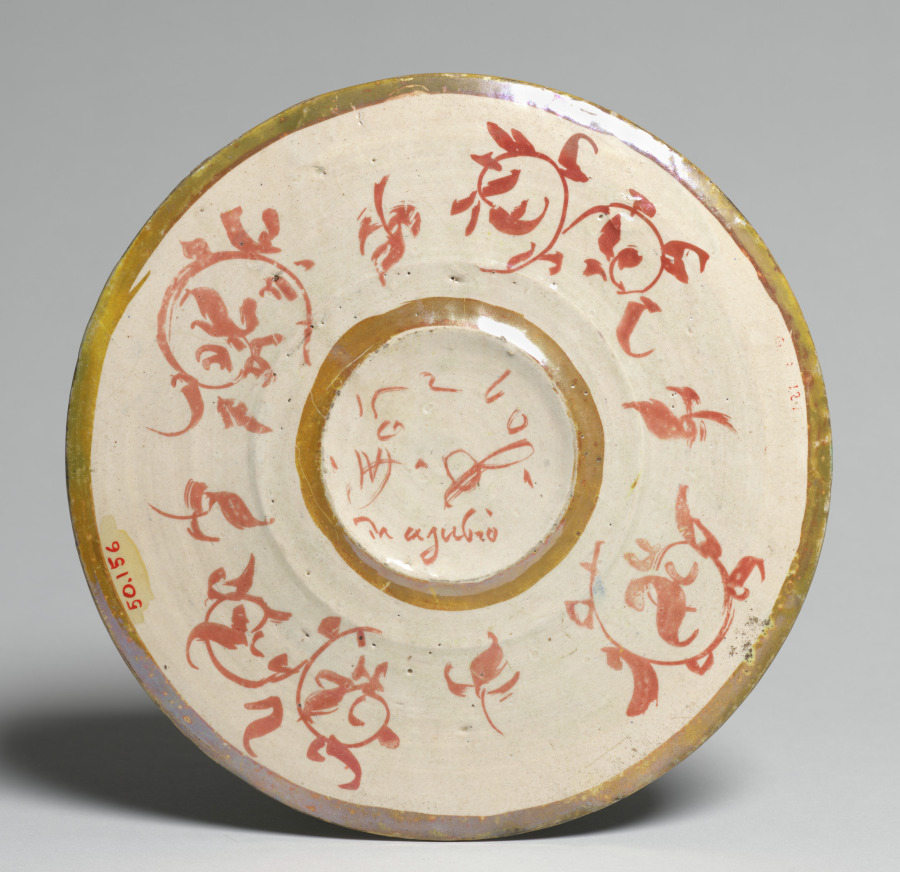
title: Plate Depicting the Myth of Cadmus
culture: Italy, Urbino region, Gubbio, 16th century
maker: circle of Maestro Giorgio Andreoli (Italian, 1465?–1553)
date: 1526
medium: tin-glazed earthenware with gold lustre (maiolica)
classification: Ceramic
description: Obeying the command of an oracle, Cadmus followed a cow to Boeotia, or “oxen-land.” There he slayed a dragon and buried its teeth in the ground. From the teeth grew a crop of warriors who fought each other until only the strongest five remained. Cadmus invited the victors to join him, and together they built the city of Thebes, where the mythological hero, Hercules (or Herakles) was later born.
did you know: This plate depicts multiple scenes from the Greek myth of Cadmus.